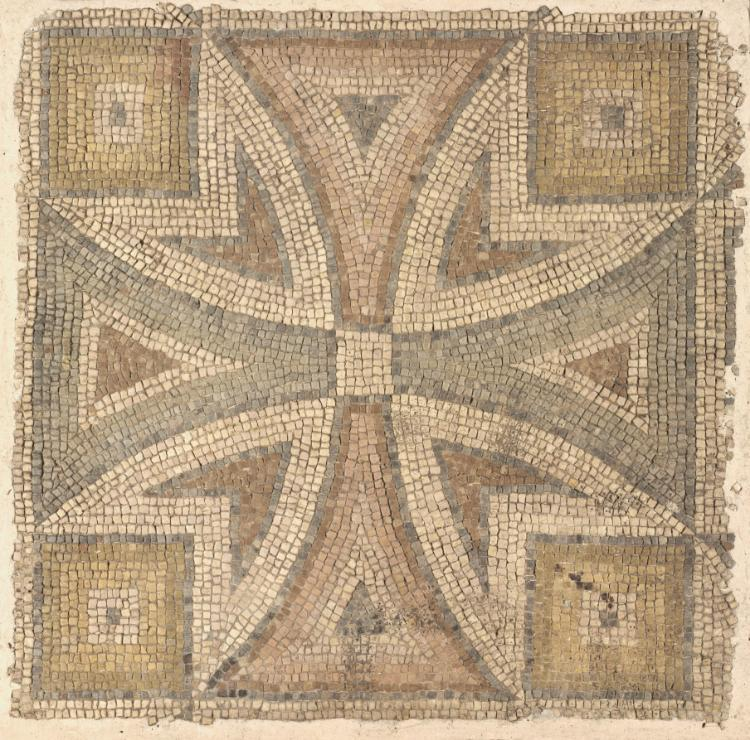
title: Cross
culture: Byzantium, North Syria, 4th - 5th centuries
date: 300s–400s CE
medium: marble tesserae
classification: Mosaic